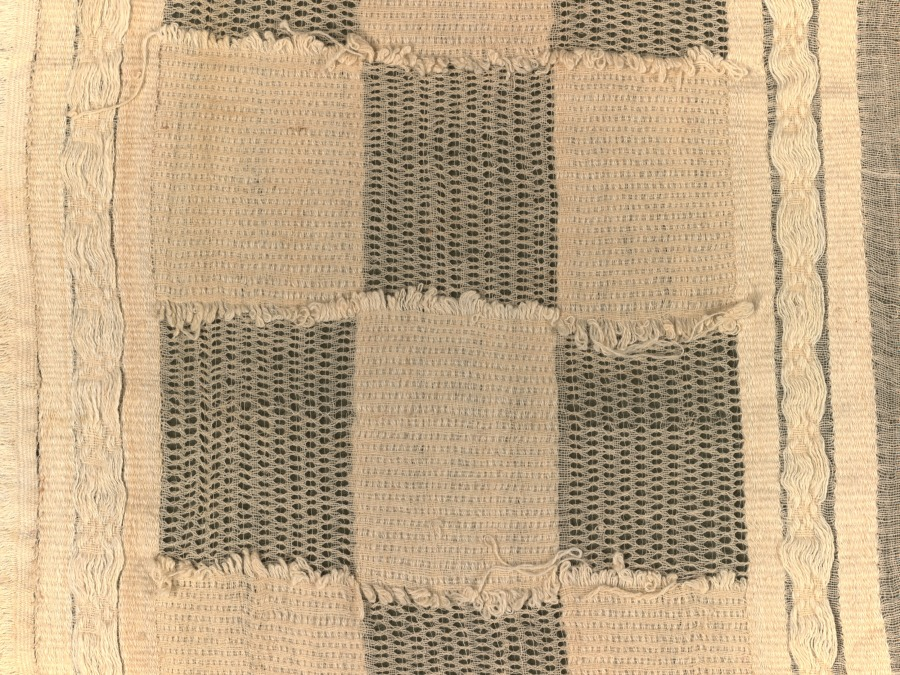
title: Loincloth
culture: Peru, North Coast, Chimú style, 1200–1460s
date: 1425–1500 (radiocarbon date, 92.3% probability)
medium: cotton; plain weave, brocaded and complex alternating gauze with 5 shots of plain weave between gauze shots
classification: Garment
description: Loincloths were basic men’s wear in ancient Peru. But the extraordinary size of some examples—this one is about eight feet long, unfolded—makes it difficult to know how they were worn, except that they were tied around the waist with the decorated panels hanging at the front and back of the body. The appearance may have been that of a billowing skirt.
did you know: This loincloth is huge!